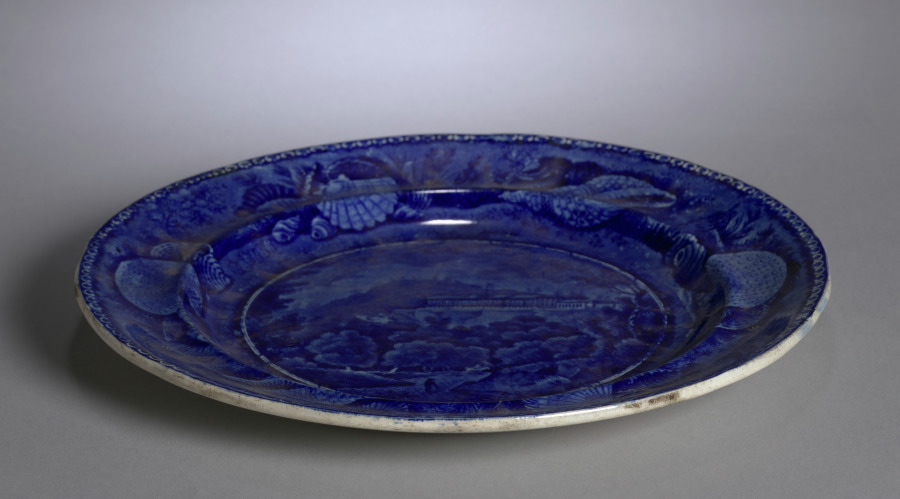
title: Plate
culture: England, Staffordshire, 19th century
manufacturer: Staffordshire Factory (British)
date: c. 1820–1830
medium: ceramic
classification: Ceramic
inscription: "Pine Orchard House, Catskill Mts." with American Eagle and "E Pluribus Unum" in scroll in blue transfer.